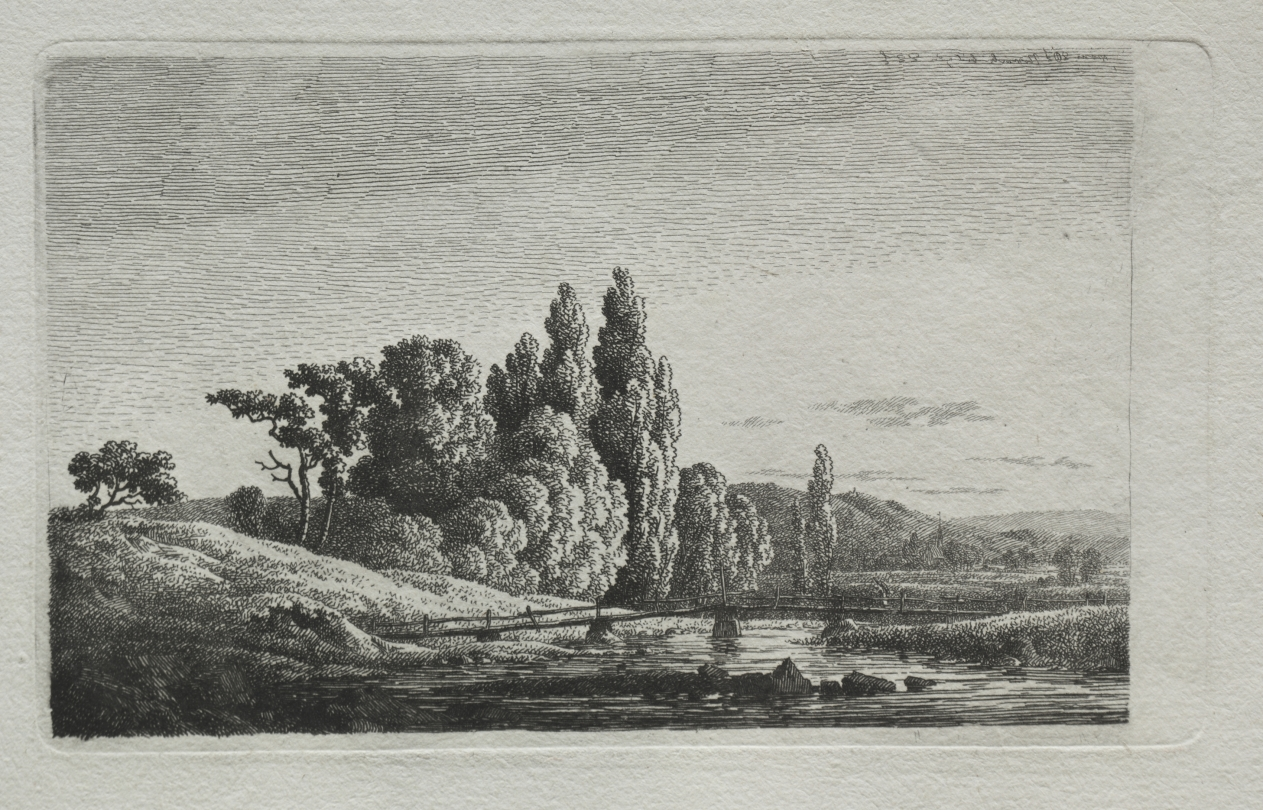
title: Footbridge with Cross before Trees at a River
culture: Germany, 19th century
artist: Caspar David Friedrich (German, 1774–1840)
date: c.1803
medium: etching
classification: Print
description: Landscape was Caspar David Friedrich’s preferred subject, and for him spending time outdoors was a religious and transcendent experience. Here, the artist presented the terrain of Northern Germany as expansive and emphasized the smallness of man next to God’s creation. The fine, dense etched lines used to depict the landscape are juxtaposed with the broad strokes that make up the sky and horizon. Friedrich experimented with printmaking for only five years, and this print is one of just a few existing impressions.